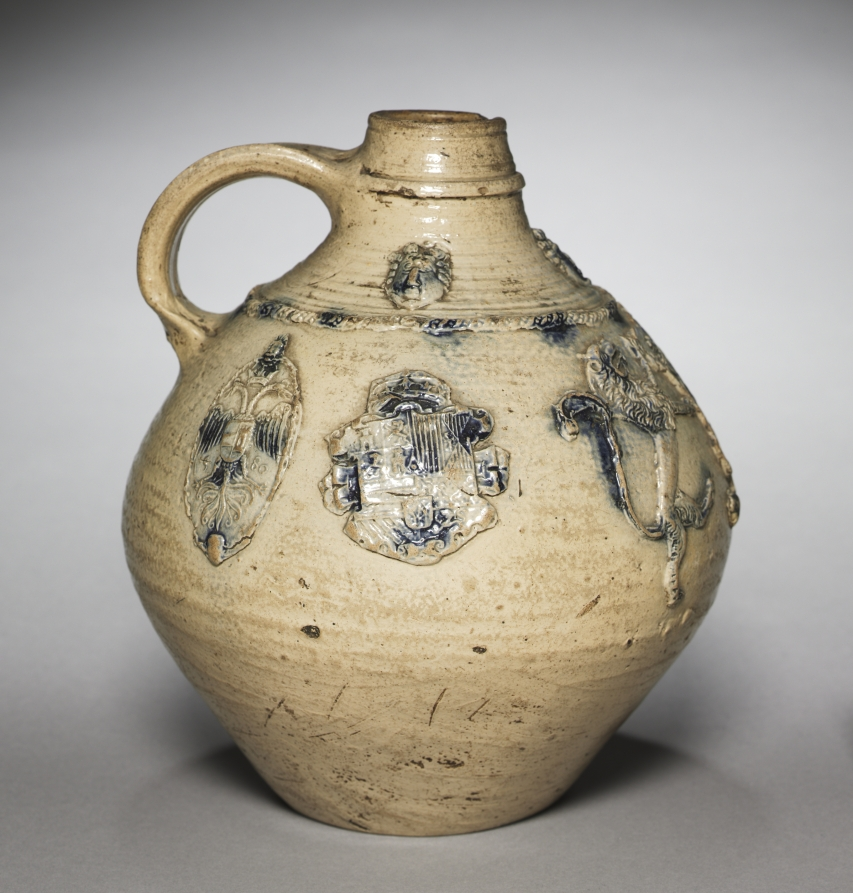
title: Jug with the Arms of Cleves-Berg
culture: Germany, Siegburg, 16th century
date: 1580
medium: salt-glazed stoneware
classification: Ceramic